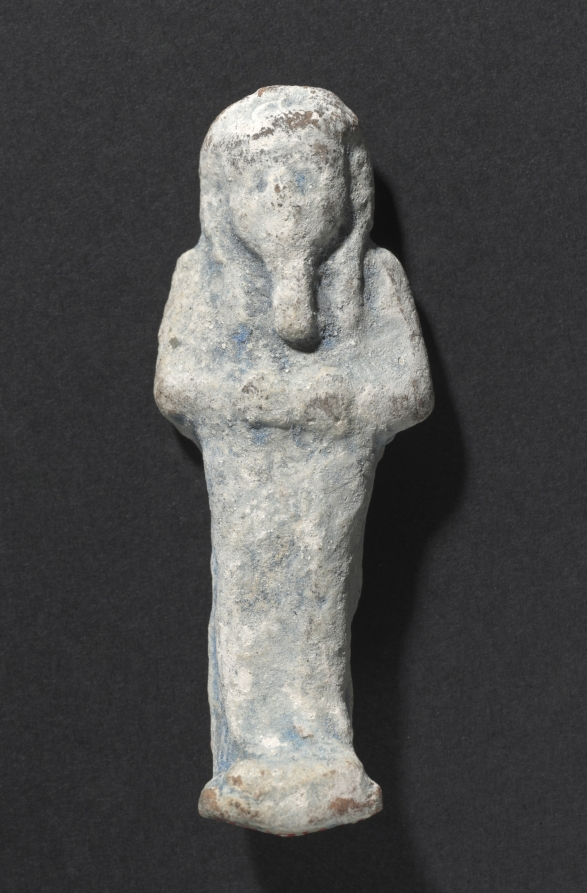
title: Shawabty of Ditamenpaankh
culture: Egypt, Late period (715–332 BCE), Dynasty 25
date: 715–656 BCE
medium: terracotta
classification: Funerary Equipment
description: High demand for shawabtys in the Late Period, a time when as many as 400 or more shawabtys were placed in the tomb with the deceased, gave rise to a specialized container for storing them: the shawabty box. This example is inscribed for the lady of the house, Ditamenpaankh, and was probably one of a pair originally made for her. The single-masted boat on the box's lid is perhaps an allusion to the pilgrimage of the deceased to the holy city of Abydos, the cult city of Osiris, king of the dead. The shawabtys inside are crude, mass-produced examples cast in an open mold. Made of terracotta, their blue paint imitates more costly shawabtys made of faience. As for the shawabty spell, it has been removed from its traditional location on the shawabty's front and relocated onto the sides of box, where it needed only to be written once, thus expediting production.